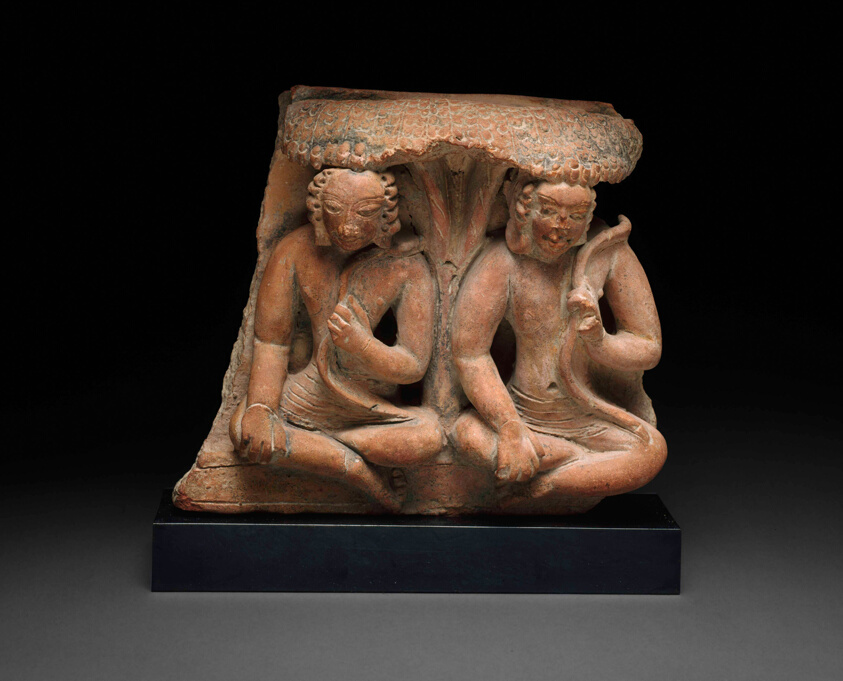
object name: Sculpture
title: Rama and Lakshmana Holding Bows, Seated under a Tree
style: South Asian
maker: India; Uttar Pradesh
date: Gupta period, c. 5th/6th century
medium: Terracotta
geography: Uttar Pradesh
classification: earthenware; ceramics; sculpture; asian art